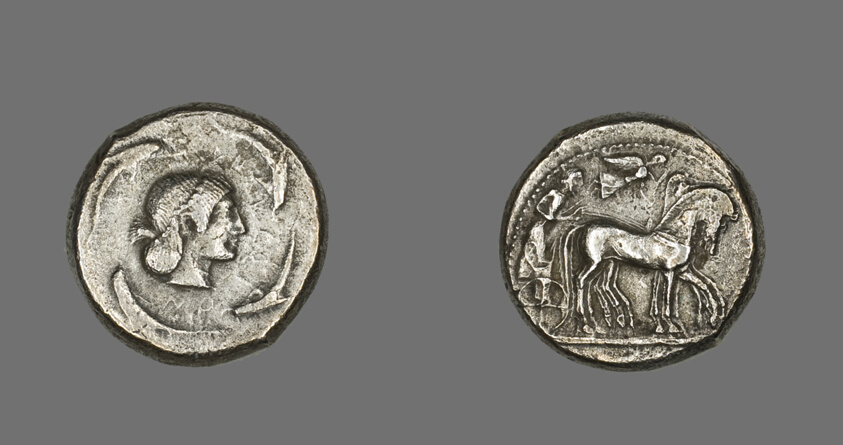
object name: Coin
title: Tetradrachm (Coin) Depicting Quadriga with Bearded Charioteer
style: archaic (greek)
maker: Greek, minted in Syracuse, Sicily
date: 485-478 BCE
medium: Silver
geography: Ancient Greece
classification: coin; ancient art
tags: Chariots